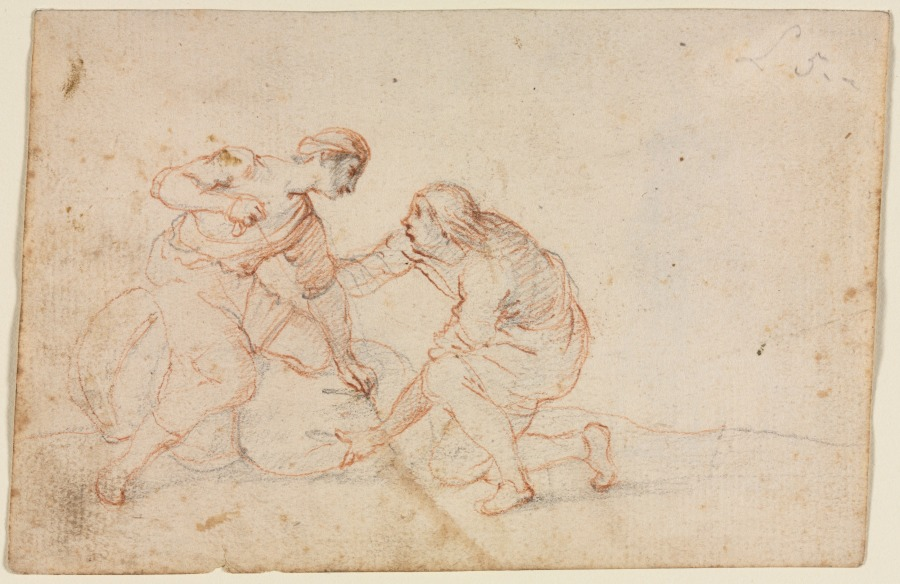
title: Two Men Tying a Bundle (recto) Five Figure Studies (verso)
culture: France, 17th century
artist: Anonymous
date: 1600s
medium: graphite and red chalk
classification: Drawing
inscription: upper right, in graphite: L 5 - (partially erased)